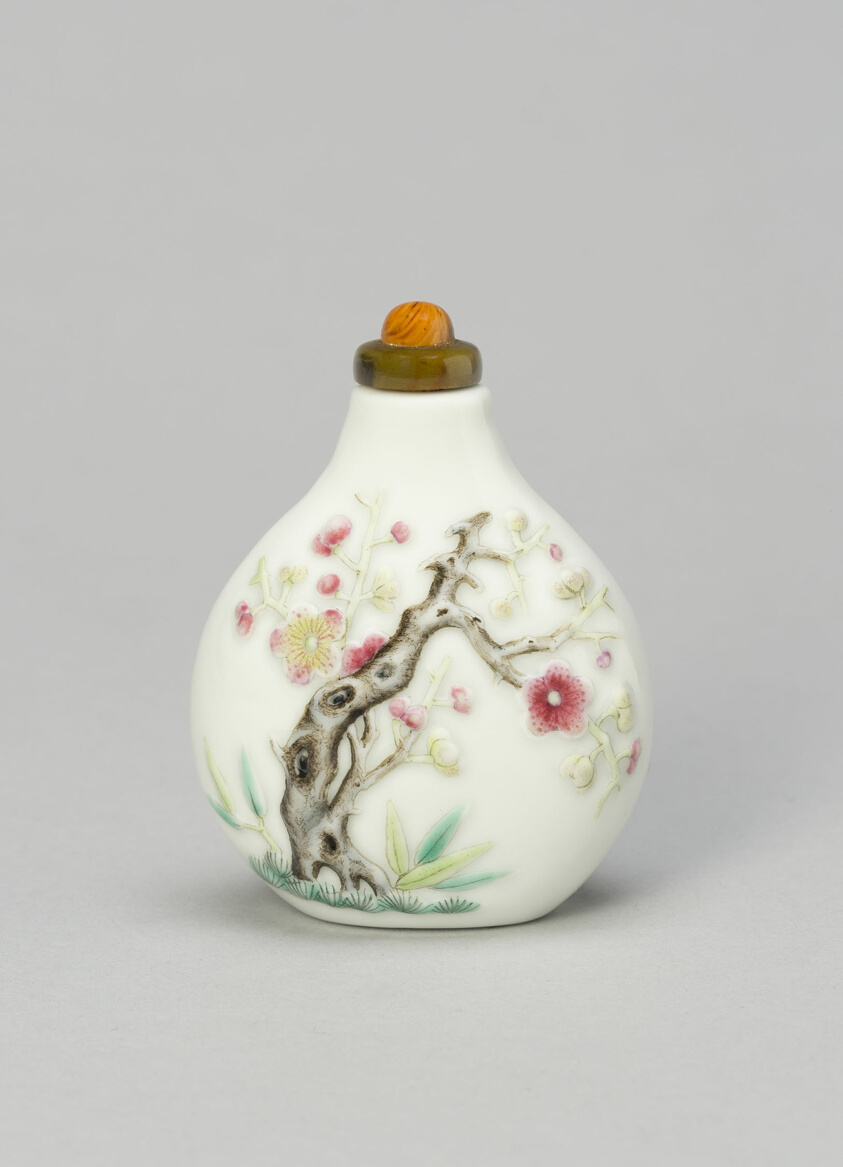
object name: Vessel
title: Snuff Bottle with Prunus, Bamboo, and Pine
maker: China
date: Qing dynasty (1644–1911), Daoguang reign mark and period (1820–1850)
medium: Porcelain painted in overglaze enamels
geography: China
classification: snuff bottle; porcelain; ceramics; asian art; vessel